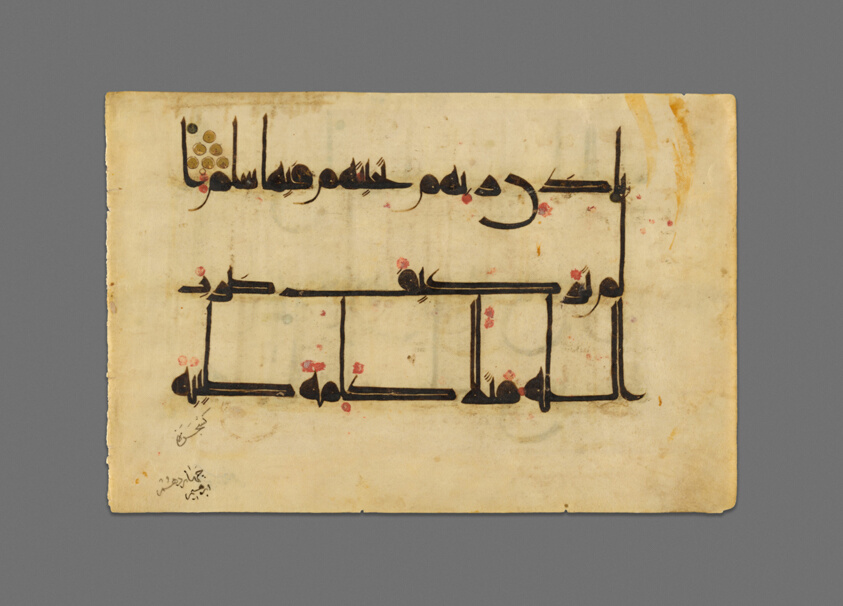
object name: Book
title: Page from a Qur'an Manuscript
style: Islamic (culture or style)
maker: Probably Tunisia, Qayrawan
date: 10th century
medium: Ink and gold on parchment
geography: North Africa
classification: calligraphy; manuscript; asian art; ritual objects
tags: writing